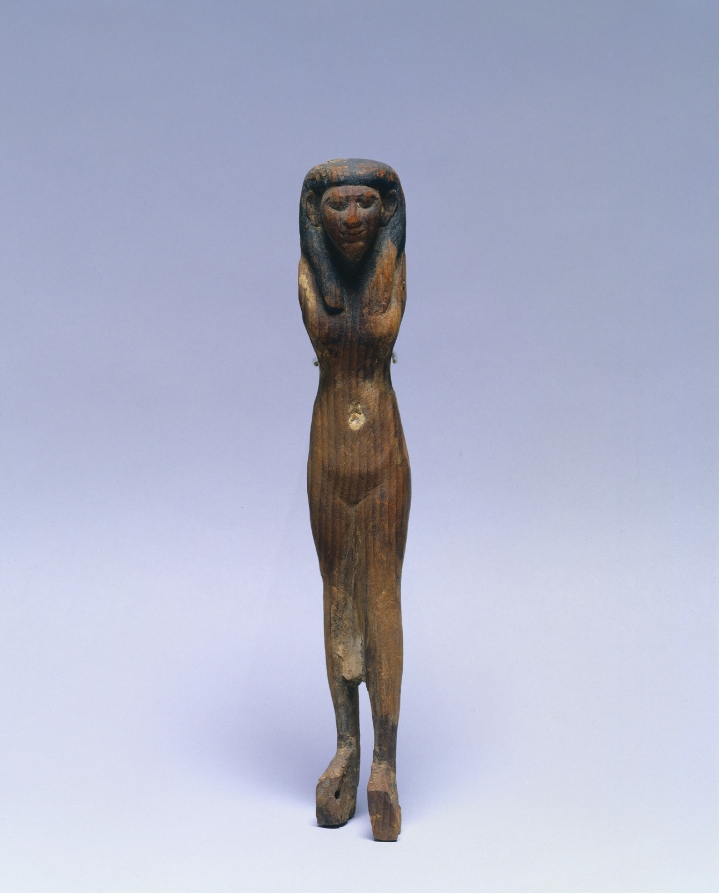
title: Female Offering Bearer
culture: Egypt, Middle Kingdom (2040–1648 BCE), Dynasty 12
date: 1980–1801 BCE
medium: painted cedar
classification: Funerary Equipment